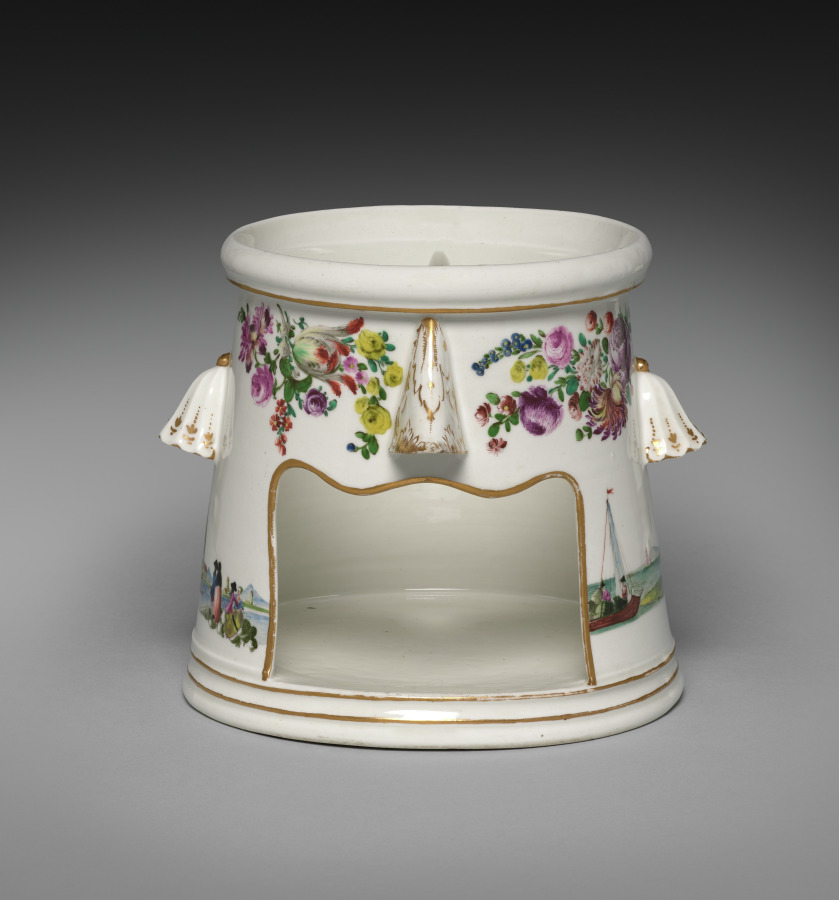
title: Food Warmer (Veilleuse)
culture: Germany, Nymphenburg, 18th century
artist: Nymphenburg Porcelain Factory (German, founded 1747)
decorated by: probably by Georg Christoph Lindemann (German)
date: c. 1758–1760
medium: porcelain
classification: Ceramic